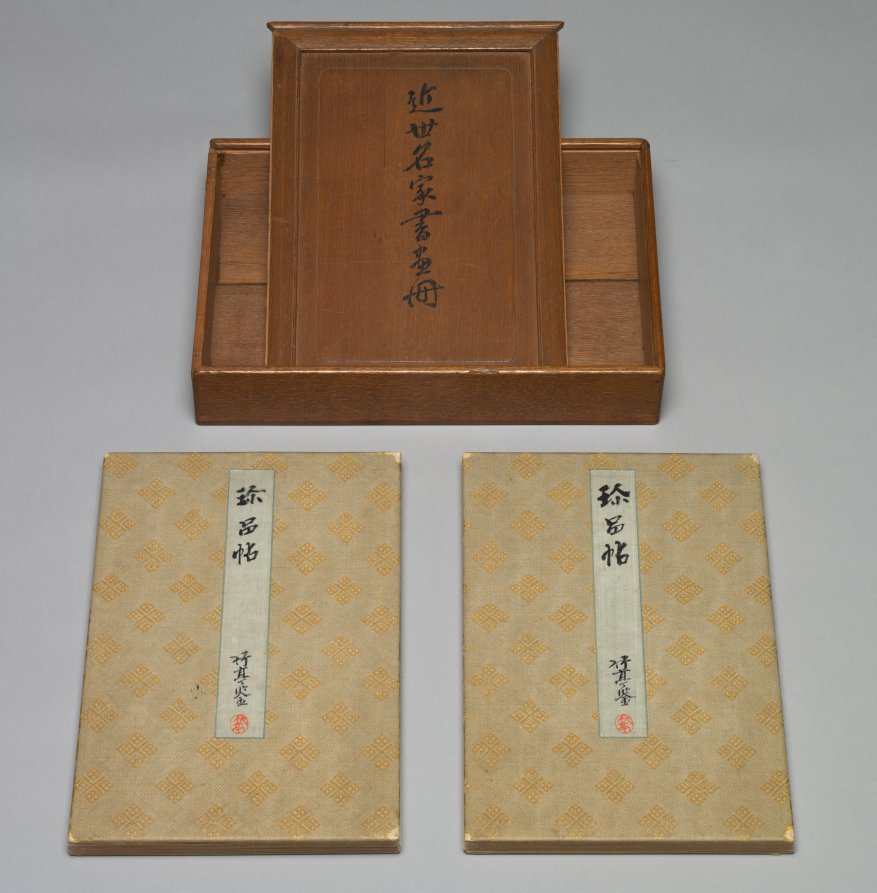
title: Famous Early Modern Calligraphers and Painters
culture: Japan, Edo period (1615–1868)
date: late 1700s to mid-1800s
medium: Set of two folding-albums; ink and color on silk and paper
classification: Portfolio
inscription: 近世名家書画冊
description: This set of two folding-albums comprises a collection of calligraphies and paintings produced by Japanese artists over a long span of time. Those whose works are represented in the albums were all deeply interested in Chinese culture. They were especially attracted to the idea they found in Chinese society of a community of educated friends who shared works in prose, poetry, and painting among one another through correspondence or gatherings. The covers of both albums are inscribed and sealed by an individual who assembled their contents for posterity.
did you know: The album's storage box has a title inscription in ink reading Famous Early Modern Calligraphers and Painters.